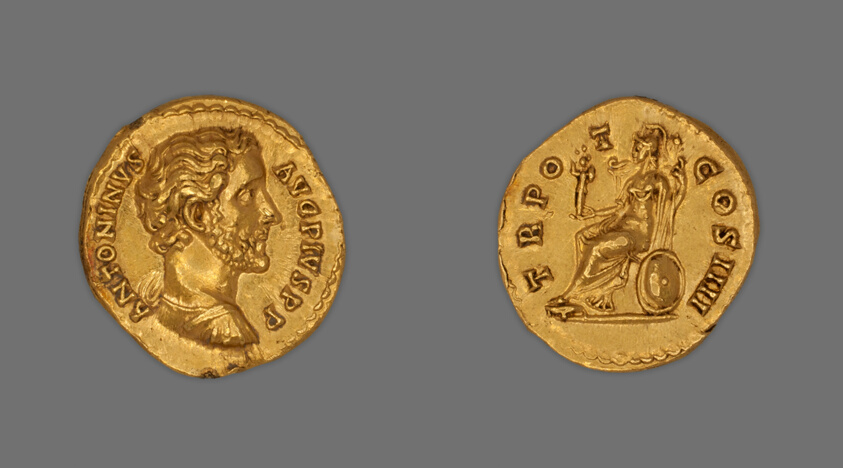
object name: Coin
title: Aureus (Coin) Portraying Emperor Antoninus Pius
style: imperial (roman), roman (ancient, style or period)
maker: Roman, minted in Rome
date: 145-161, issued by Antoninus Pius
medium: Gold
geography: Rome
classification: coin; ancient art